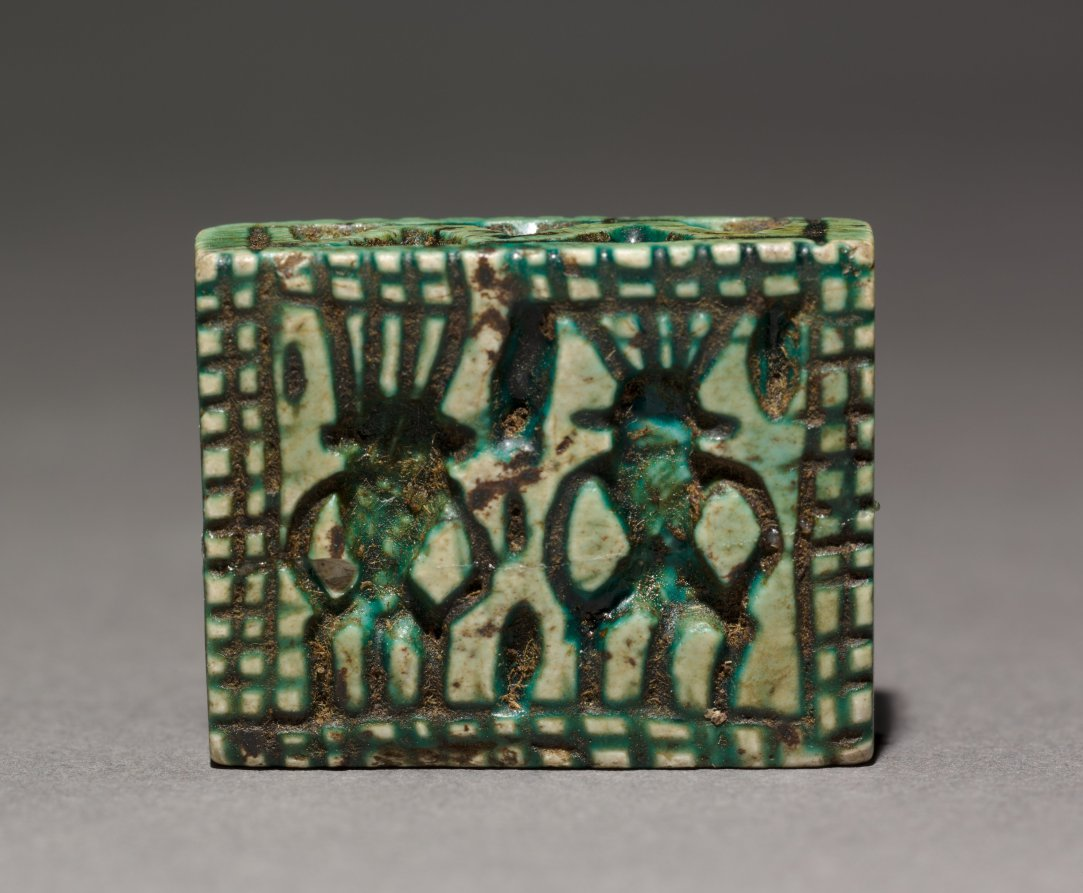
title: Double-Sided Plaque Amulet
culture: Egypt, Third Intermediate (1069–715 BCE)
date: 1069–715 BCE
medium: green-glazed steatite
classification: Amulets